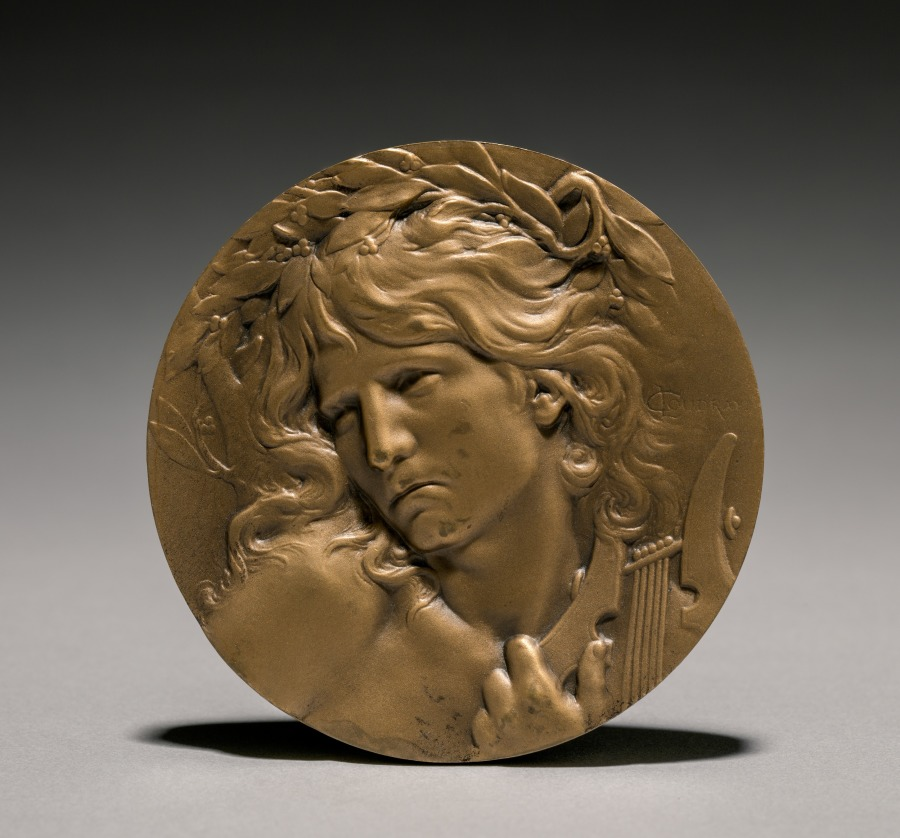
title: Medal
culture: France, 20th century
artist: Marie Alexandre Lucien Coudray (French, 1864–1932)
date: 1900s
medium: bronze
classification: Metalwork